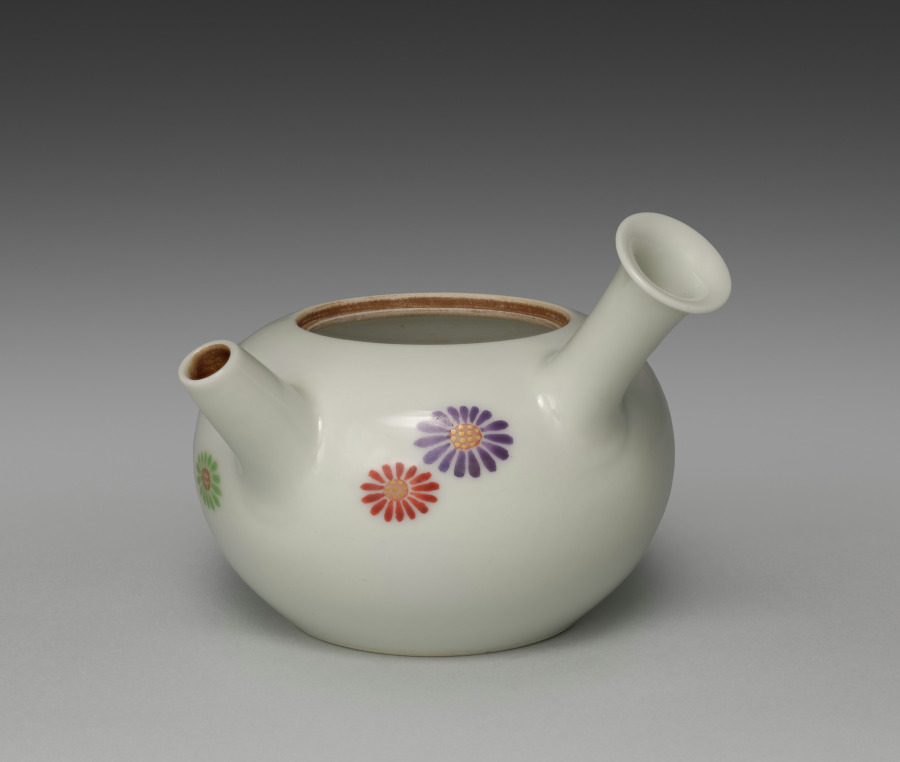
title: Teapot with Chrysanthemum Motifs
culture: Japan, Meiji period (1868–1912)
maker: Seifū Yohei III (Japanese, 1851–1914)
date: 1912–14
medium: Porcelain with overglaze color enamel and gold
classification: Ceramic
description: This side-handled sencha teapot has the lid flush against the body, forming an oblong orb. It is decorated with a sprinkling of similar chrysanthemum motifs in red, green, and purple overglaze color enamels with centers of pale red dotted with gold.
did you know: This teapot with chrysanthemum motifs shows off Seifū Yohei III’s technique of enamels painted over the glaze.